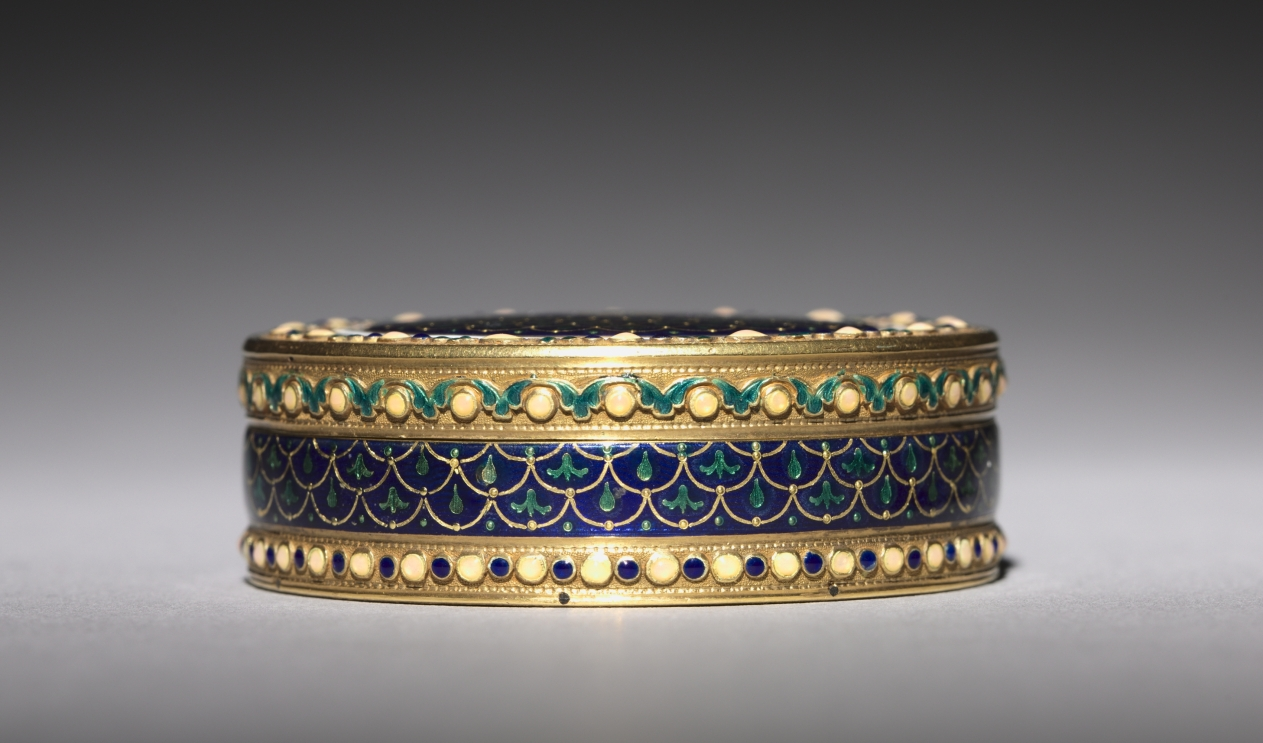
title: Powder Box (Poudrier)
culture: France, 18th century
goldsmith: Jean-Joseph Barrière (French)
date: 1779–80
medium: enamel on gold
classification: Miscellaneous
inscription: [Maker's mark of Jean-Joseph Barrière, master goldsmith in 1763, bottom; exterior wall; inside cover]: "JJB"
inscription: [Warden's mark for Paris, 1779-1780, exterior wall]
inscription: [Discharge mark of Henry Clavel I, Paris, 1780-1782, exterior wall]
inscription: [Counter-mark of Henry Clavel I and Jean-Francois Kalendrin, Paris,1782-1789, exterior wall]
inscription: [Restricted warranty mark for gold, Paris, exterior wall]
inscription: [Three illegible marks, bottom]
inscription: [Three illegible marks, cover]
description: In the 1700s ornately enameled boxes became a popular accessory in the French court. These boxes often held powdered tobacco, called snuff. However, this box, which is unhinged, likely held powder, rouge, or face cream. Pageantry and performance were important aspects of social interaction during this period. The extravagant designs and associated functions of these boxes communicated social and political status.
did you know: Jean-Joseph Barrière received his designation of master goldsmith in 1763, a coveted title that required candidates to complete a lengthy apprenticeship followed by a test of skill.